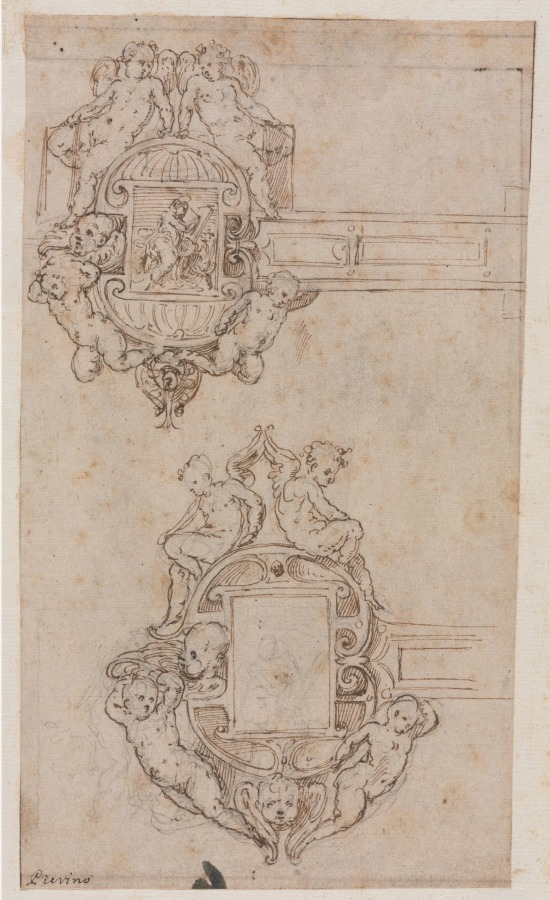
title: Design for Decorative Hinges (recto) Border Lines (verso)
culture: Italy, 16th century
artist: Luzio Romano (Italian, active 1528–75)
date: mid 1500s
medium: pen and brown ink over black chalk; framing lines in brown ink (lower left, upper right)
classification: Drawing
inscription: ower left, in brown ink: Pierino ; RECTO OF SECONDARY SUPPORT, upper right, in brown ink: 128 ; upper right, in black chalk(?): 32 ; center right, in graphite: 28 [underlined, sideways] ; lower right, in graphite: cx[l?] ; VERSO OF SECONDARY SUPPORT, lower right, in graphite: A 309[7?] . ; FRAGMENT OF OLD MAT (now removed), across top, in graphite: Pierino del Vaga (circle of) Door Hinges ; across center, in graphite: Enlarged duplicate of / drawing at Windsor Castle / A. N. [underlined] ; lower right, in graphite: 159